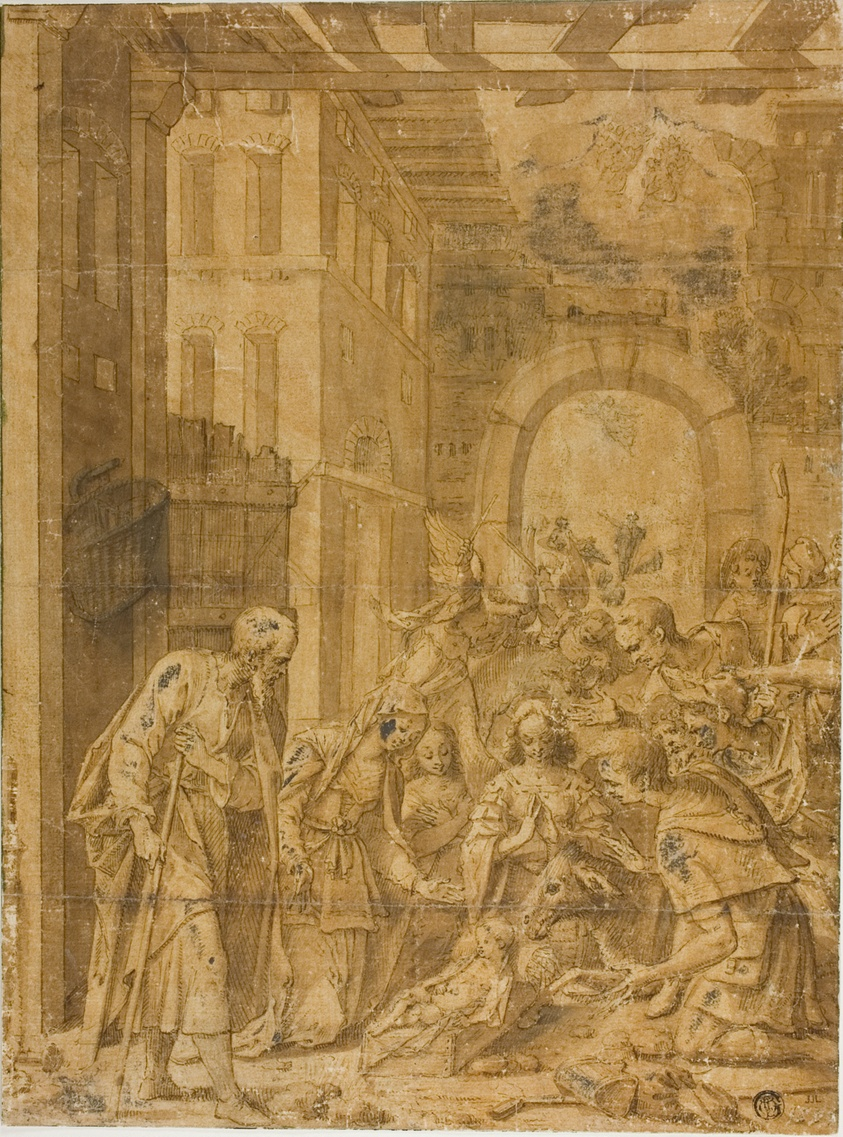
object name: Drawing and Watercolor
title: Adoration of the Shepherds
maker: Style of Johann von Aachen (German, 1552-1616); or attributed to Giuseppe Heintz (German, c. 1600-c. 1678)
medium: Pen and brown ink and brush and brown wash, heightened with lead white (discolored), on tan laid paper, laid down on ivory laid paper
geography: Germany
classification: pen and ink drawings; drawings (visual works); prints and drawing